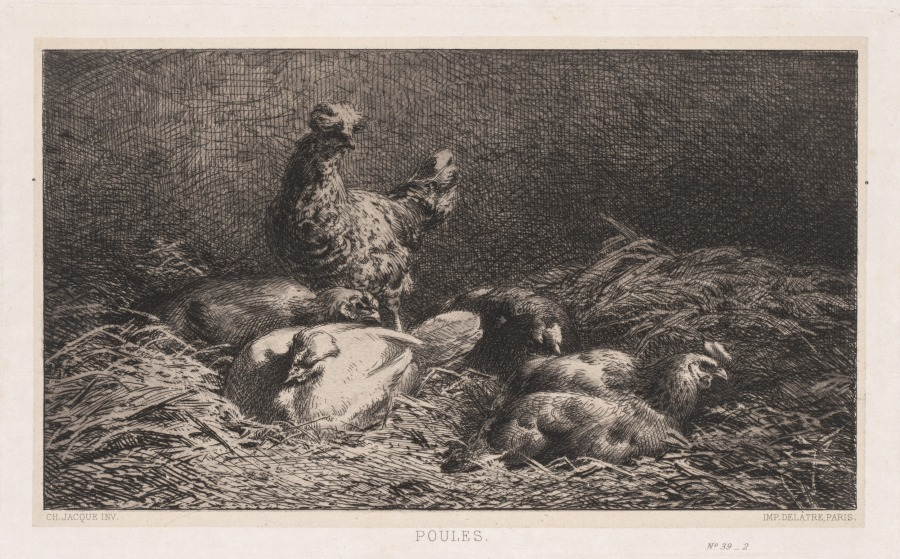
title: Chickens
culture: France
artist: Charles-Émile Jacque (French, 1813–1894)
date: 1867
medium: etching on chine collé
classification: Print